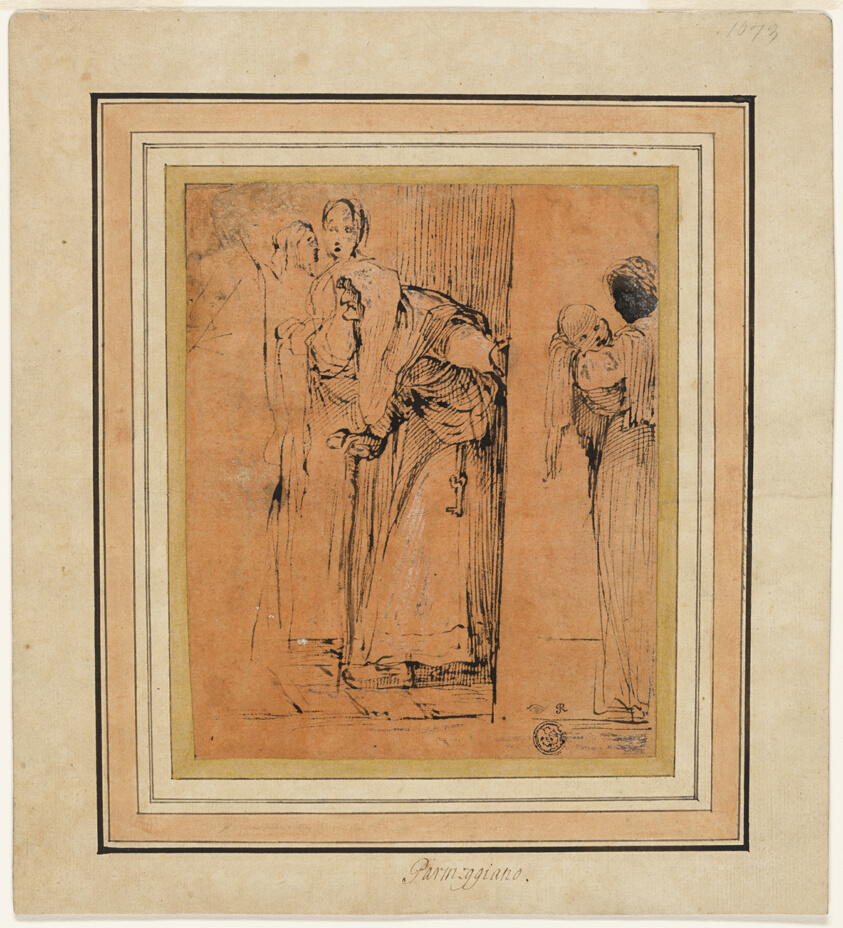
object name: Drawing and Watercolor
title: Old Woman with Cane in Door, with Black Maid Holding Child, and Other Figures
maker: Follower of Francesco Mazzola, called Parmigianino; Italian, 1503-1540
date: c. 1580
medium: Pen and brown ink, heightened with lead white (partly oxidized), on cream laid paper prepared with salmon wash, laid down on ivory laid card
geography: Italy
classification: pen and ink drawings; drawings (visual works); prints and drawing